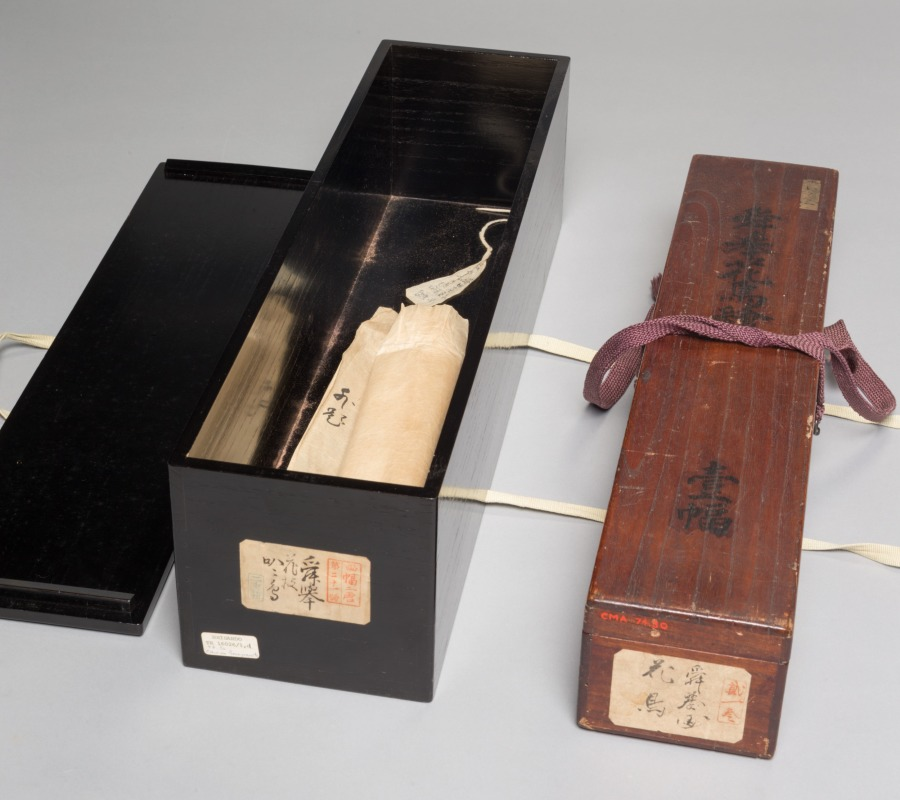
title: Crow on a Pomegranate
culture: Japan, Muromachi period (1392–1573)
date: 1500s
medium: hanging scroll; ink on paper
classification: Painting